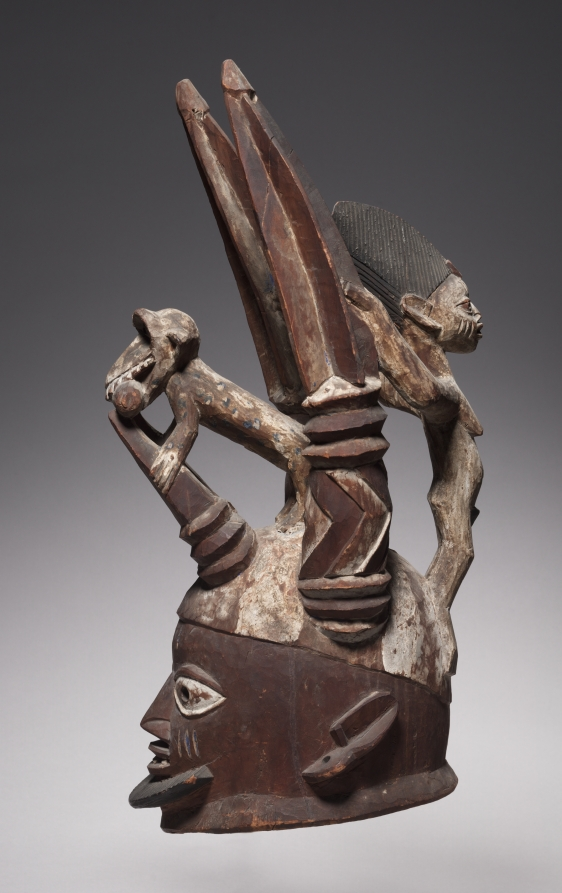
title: Helmet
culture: Africa, West Africa, Nigeria, Yorùbá-style maker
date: late 1800s–early 1900s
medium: Wood and paint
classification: Mask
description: This type of helmet used by the Oro association, is often mistaken for the more common Egungun. While Egungun masquerades are performed to honor an individual's ancestors, Oro masquerades are performed in conjunction with the actual funeral of a Yoruba person. The Oro association is very secretive, and the visibility of helmets like this one is generally restricted. Oro is also responsible for carrying out criminal sentences, such as collecting fines, repossessing goods, and executing those convicted of a capital crime. The female figure suspended from the back of the horns may reference the victims of Oro executions. This work has been attributed to the Esubiyi School of Abeokuta, founded about 1860.